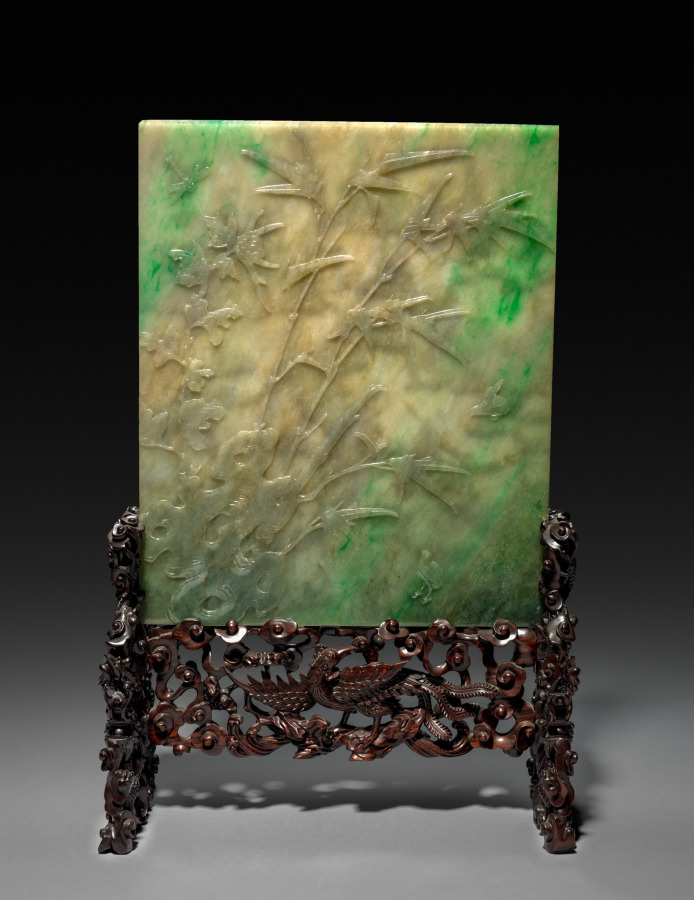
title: Table Screen with Stand (stand)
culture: China, Qing dynasty (1644-1911)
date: 1644–1911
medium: carved wood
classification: Wood